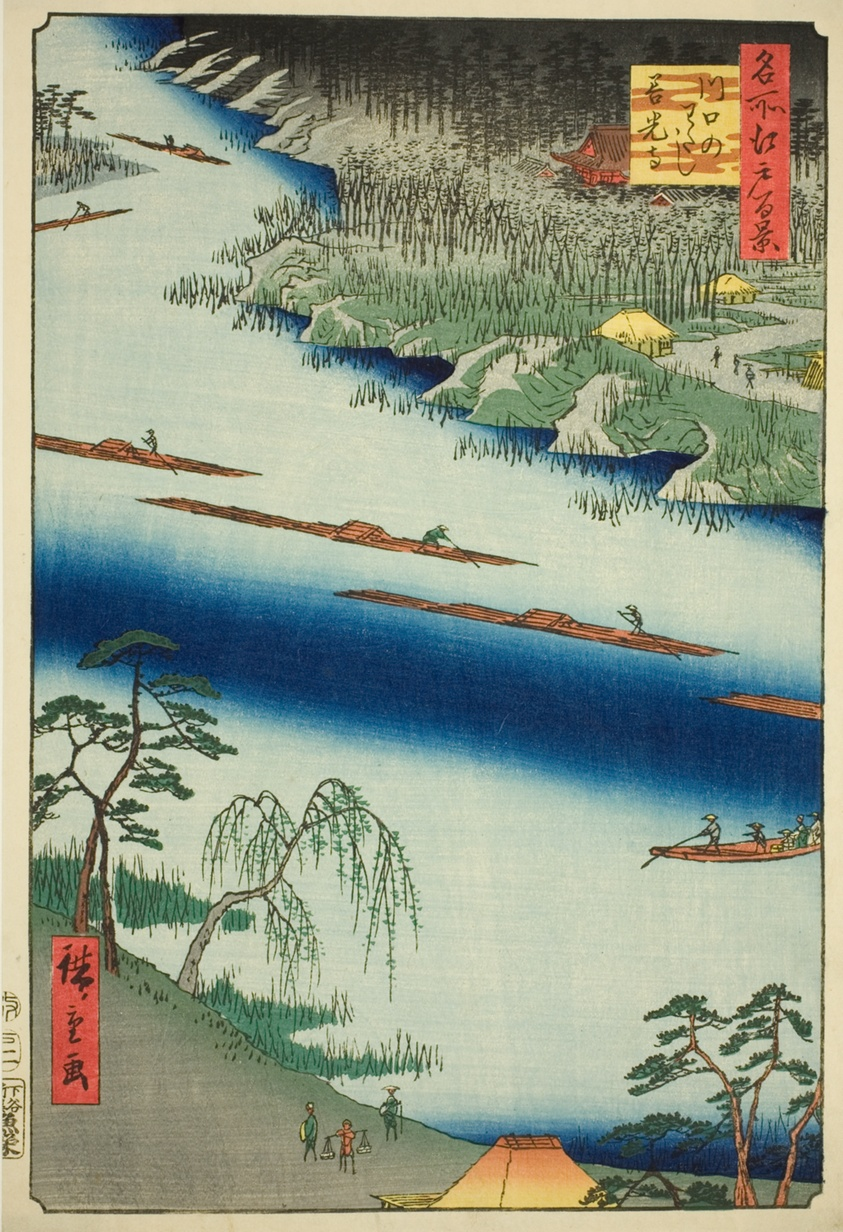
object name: Print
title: Zenkoji Temple and the Ferry at Kawaguchi (Kawaguchi no watashi Zenkoji), from the series "One Hundred Famous Views of Edo (Meisho Edo hyakkei)"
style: Japanese (culture or style)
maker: Utagawa Hiroshige 歌川 広重; Japanese, 1797-1858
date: 1857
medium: Color woodblock print; oban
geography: Japan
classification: woodblock print; print; asian art